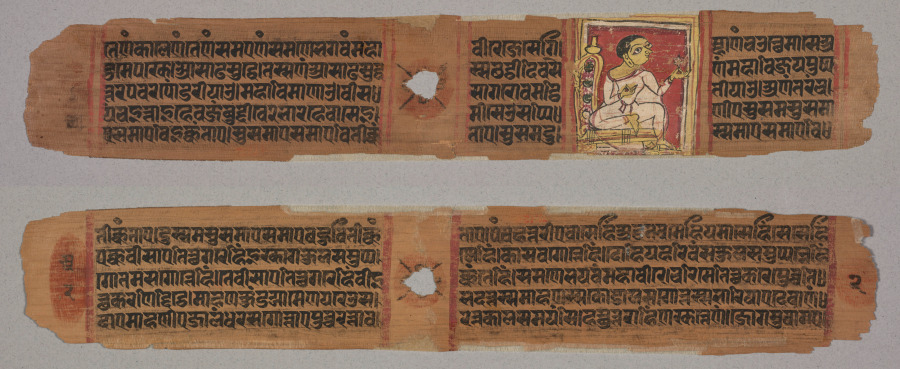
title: Folio 2, from a Kalpa-sutra and Story of Kalakacharya: Monk Holding a Flower (recto); text (verso)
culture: Western India, Gujarat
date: 1287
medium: gum tempera and ink on palm leaf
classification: Painting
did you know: The text describes the descent of Mahavira from heaven into the womb of the Brahman woman Devananda.